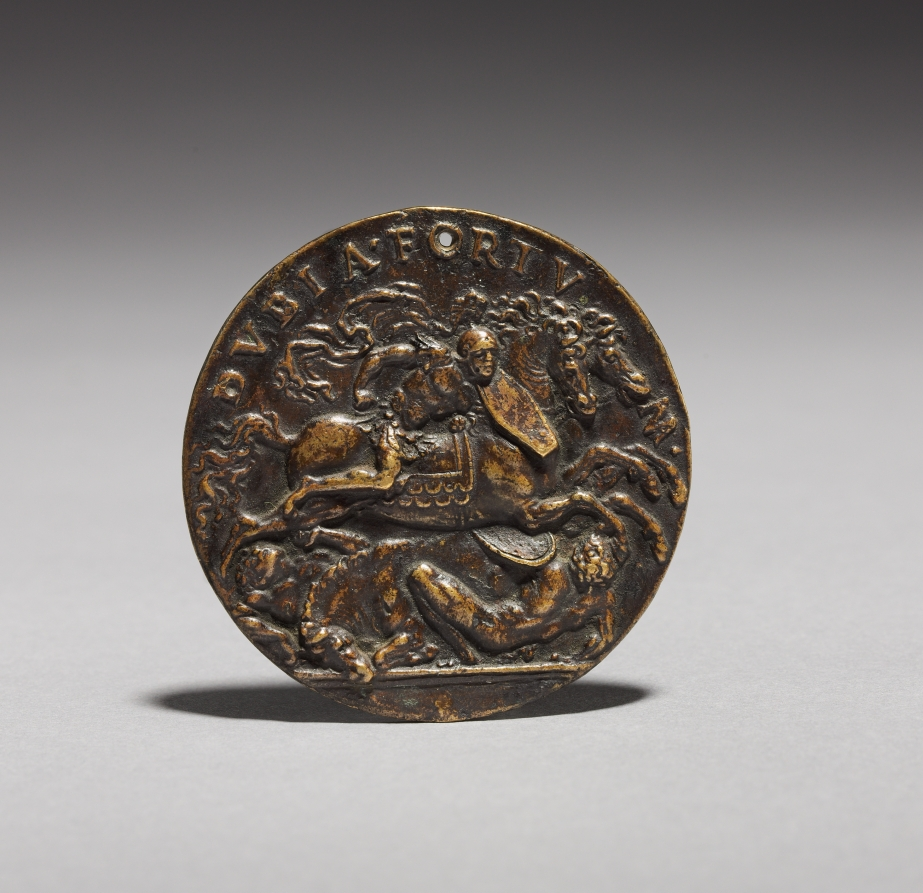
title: Dubia Fortuna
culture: Italy, 16th century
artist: Moderno (Italian, 1467–1528)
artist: and Workshop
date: c. 1505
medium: bronze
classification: Sculpture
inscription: Inscribed: DVBIA.FORTV-NA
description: The inscription DUBIA FORTUNA is generally translated as "doubtful fortune," and speaks to the vagaries of war.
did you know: Fortuna, mentioned on this plaquette's inscription, is the Roman goddess of luck.